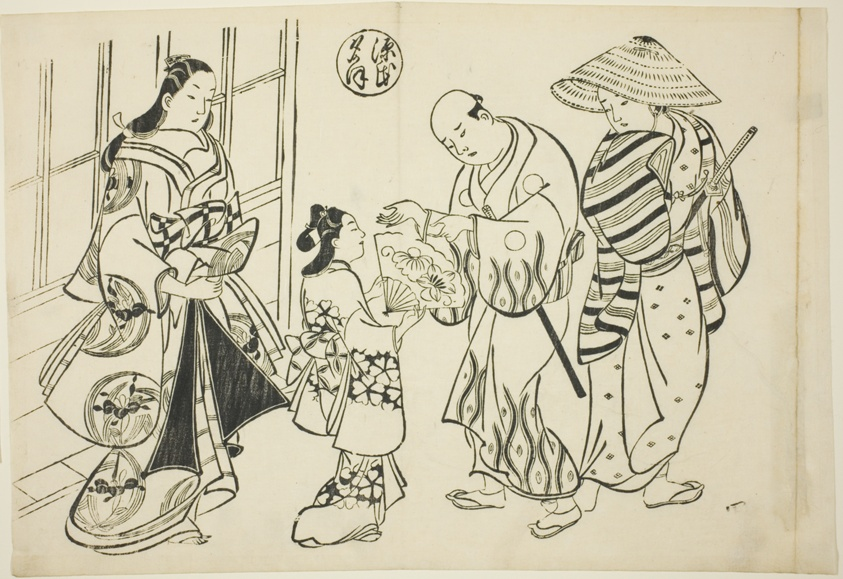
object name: Print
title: The Yugao Chapter from "The Tale of Genji" (Genji Yugao), from a series of Genji parodies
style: Japanese (culture or style)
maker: Okumura Masanobu (Japanese, 1686-1764)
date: c. 1710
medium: Woodblock print; oban, sumizuri-e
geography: Japan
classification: woodblock print; print; asian art; woodblock